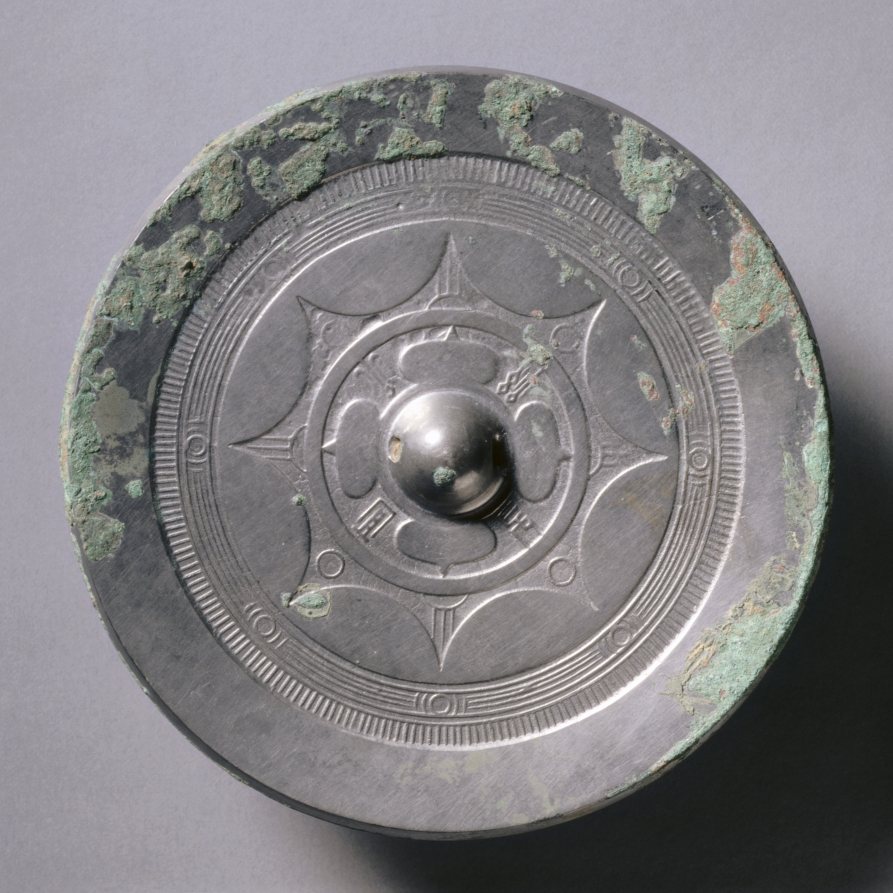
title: Mirror with Quatrefoil, Concentric Circles, and Linked Arcs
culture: China, Eastern Han dynasty (25–220 CE)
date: 25–220 CE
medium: bronze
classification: Metalwork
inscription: May [the mirror] be cherished by your sons and grandsons for a long time.